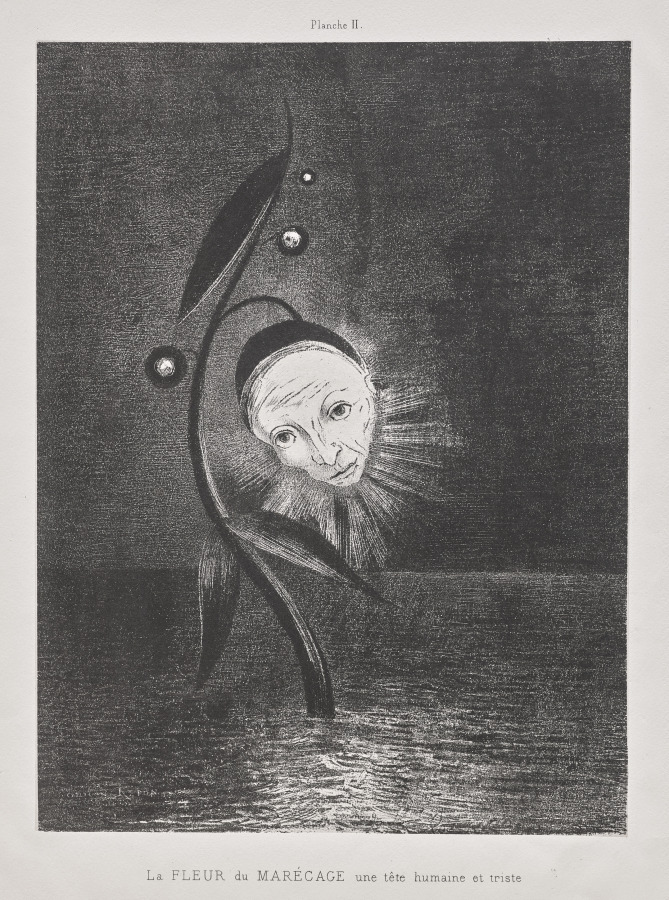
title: The Marsh Flower, a Sad Human Head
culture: France, 19th century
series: Homage to Goya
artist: Odilon Redon (French, 1840–1916)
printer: Lemercier & Cie.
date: 1885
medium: lithograph on China paper laid on wove paper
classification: Print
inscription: printed above image at center: Planche II.; below image at center: La FLEUR du MARÉCAGE une tête humaine et triste.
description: This series is one of many that Odilon Redon created throughout his career. Nearly two-thirds of his lithographs took the form of portfolios—prints connected conceptually by a theme or narrative and physically by a folder or binding. Such works were often dispersed over time, but Cleveland was fortunate to acquire several complete sets with their original covers during the 1920s. Dating from Redon’s early experimentation with lithography, Homage to Goya was intended as a tribute to 18th-century Spanish master Francisco de Goya, whose interest in dreams and the subconscious influenced Redon. The six seemingly unrelated images celebrate Goya’s ambiguity and collectively suggest the introspection and isolation of artistic practice.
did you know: This portfolio was published in an edition of 50, one of which Redon sent to poet Stéphane Mallarmé soon after Redon became a frequent participant in a literary salon held regularly at Mallarmé's home.